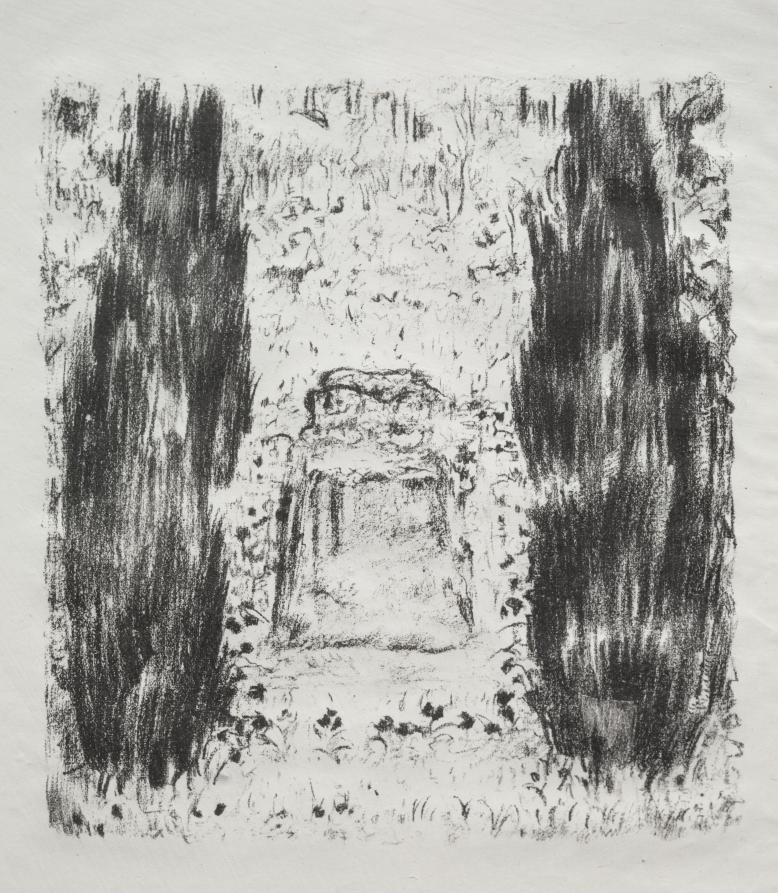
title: Illustration for Daphnis and Chloë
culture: France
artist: Pierre Bonnard (French, 1867–1947)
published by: Published by Ambroise Vollard; Printed by Auguste Clot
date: 1902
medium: lithograph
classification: Print